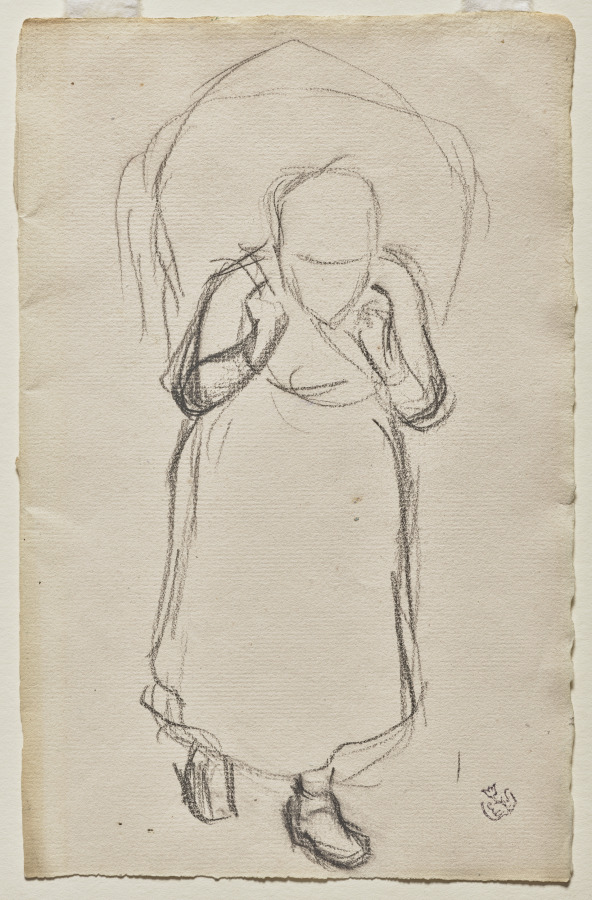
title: Study for "Seaweed Gatherers, Yport"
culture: France, 19th century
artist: Claude-Emile Schuffenecker (French, 1851–1934)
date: c. 1888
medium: black chalk on laid paper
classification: Drawing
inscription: Signed, at lower right, in black ink, with artist’s stamp (not in Lugt); watermark: ED&Cie. [inside cartouche] (Emile Desloye)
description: Claude-Emile Schuffenecker worked closely with Paul Gauguin to form Synthetism, a style of art that broke from Impressionism in favor of flat planes of bold color and invented subjects. This drawing is a study for one of Schuffenecker’s most important works, Seaweed Gatherers, Yport, which exists in two versions, one of which belongs to the Cleveland Museum of Art. The other version of the drawing (owned by the Art Institute of Chicago) was featured in an influential 1889 exhibition organized by Gauguin and Schuffenecker at the Café Volpini on the grounds of the Universal Exposition. Both artists saw imagery of seaweed gatherers—a task undertaken by working class people in rural French coastal towns—as exemplifying the simplicity they sought in their art.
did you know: Claude-Emile Schuffenecker met Paul Gauguin while the two were working at the same Parisian stockbrokerage. They both abandoned their jobs to become professional artists following a market crash in 1882.